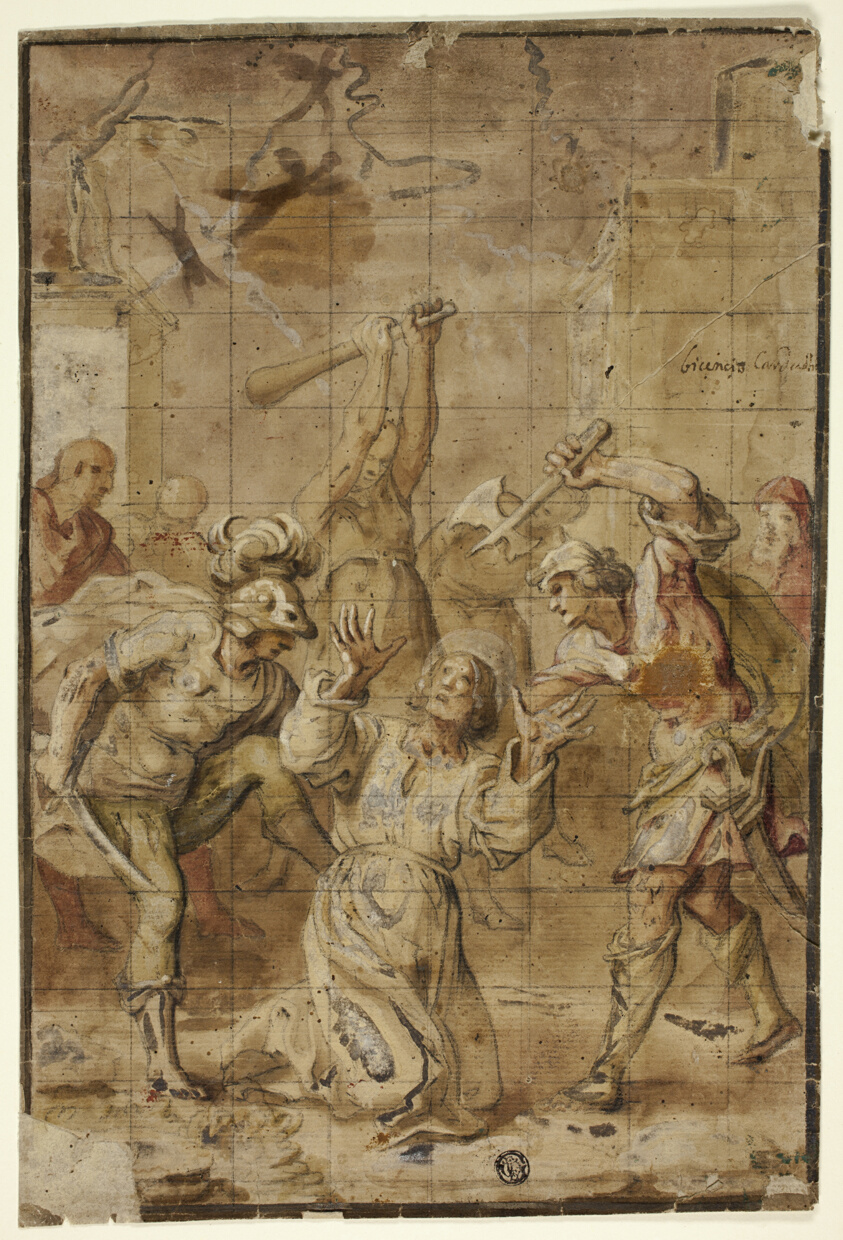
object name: Drawing and Watercolor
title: Martyrdom of a Saint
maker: Workshop of Vicencio Carducho (Italian, 1570-1638)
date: 1626/32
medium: Watercolor and black chalk, heightened with lead white (discolored), on cream laid paper, laid down on ivory laid paper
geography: Italy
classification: ink or chalk wash; drawings (visual works); prints and drawing